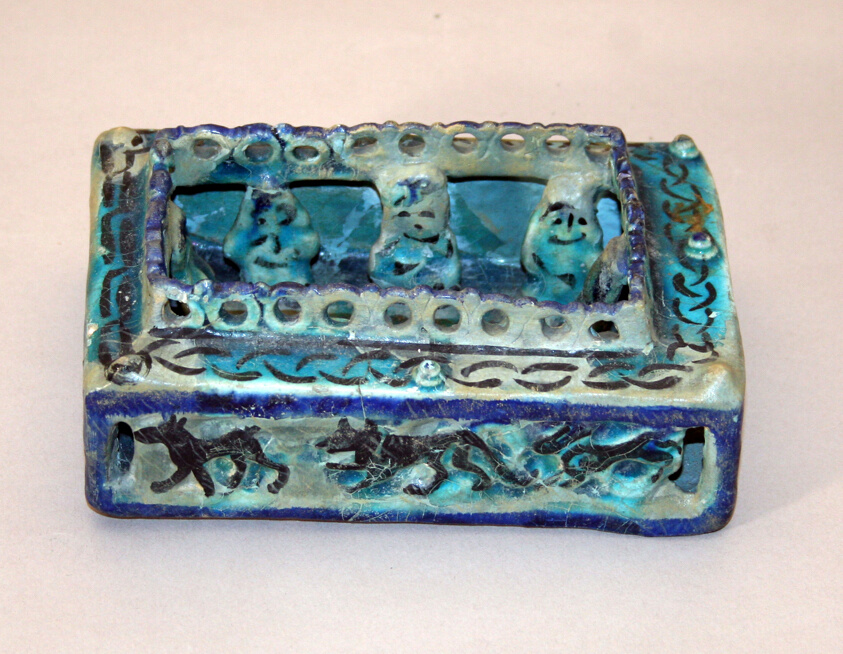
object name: Decorative Arts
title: House Model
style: Islamic (culture or style)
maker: Iran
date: Ilkhanid dynasty (1256–1353), 13th century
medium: Fritware painted in black under a transparent turquoise glaze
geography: Iran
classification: ceramics; asian art; decorative arts